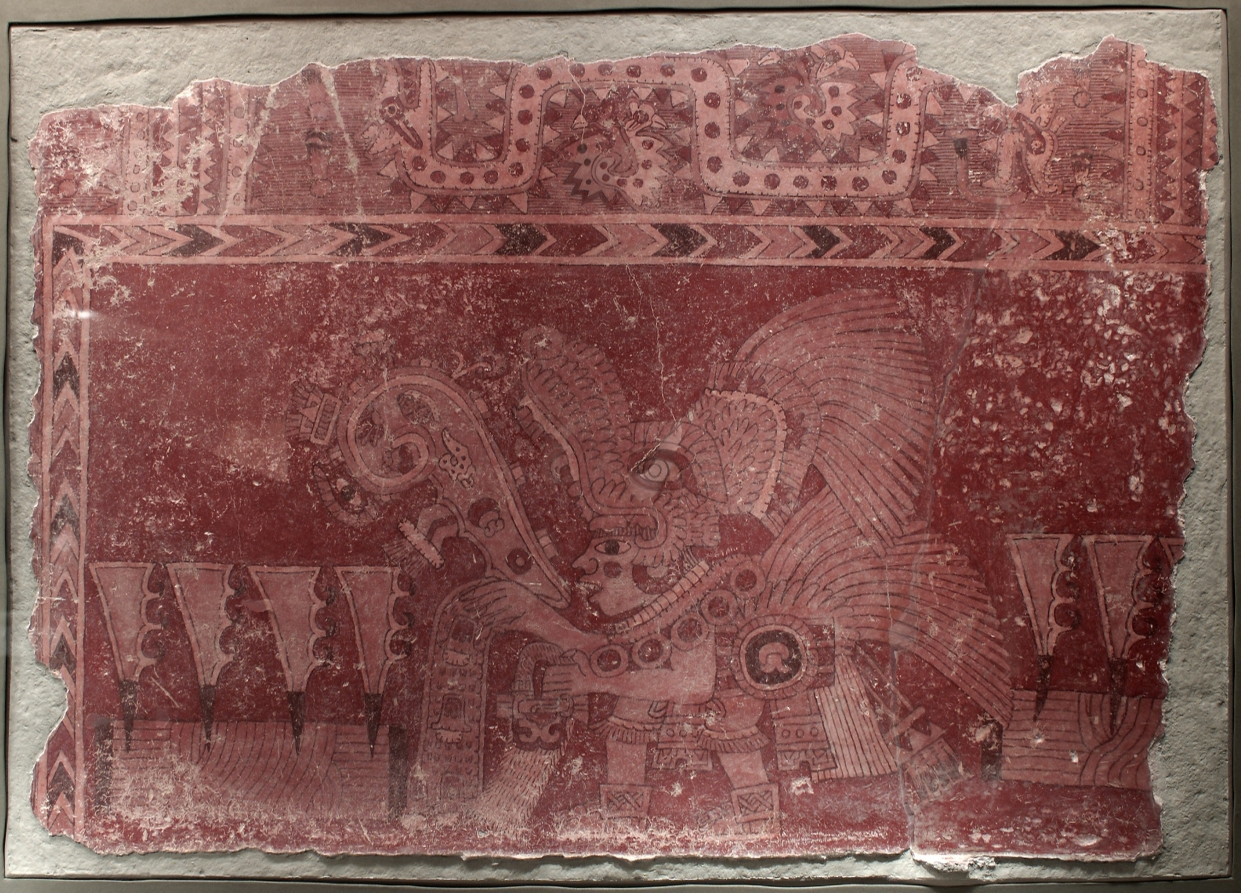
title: Mural Fragment with Elite Male and Maguey Cactus Leaves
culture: Central Mexico, Tlacuilapaxco apartment compound(?), Teotihuacán style, Classic Period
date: 500–550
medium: fresco on wall fragment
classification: Painting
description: This richly dressed elite male belonged to a row of identical figures who processed along the walls of a patio in one of Teotihuacán’s wealthy apartment compounds. He offers a chant or prayer, materialized in a mouth scroll, along with a flower-filled libation that cascades from one hand. In the other hand, he carries an incense bag. The thorny spines of the maguey cactus, in front and behind, may allude to the offering of precious blood and a ritual beverage made from the cactus’s sap (pulque, a less refined form of tequila). The spines are thrust into objects that may represent bundles or plots of land.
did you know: This fragment is from a larger composition that covered the walls of a patio at Teotihuacan.